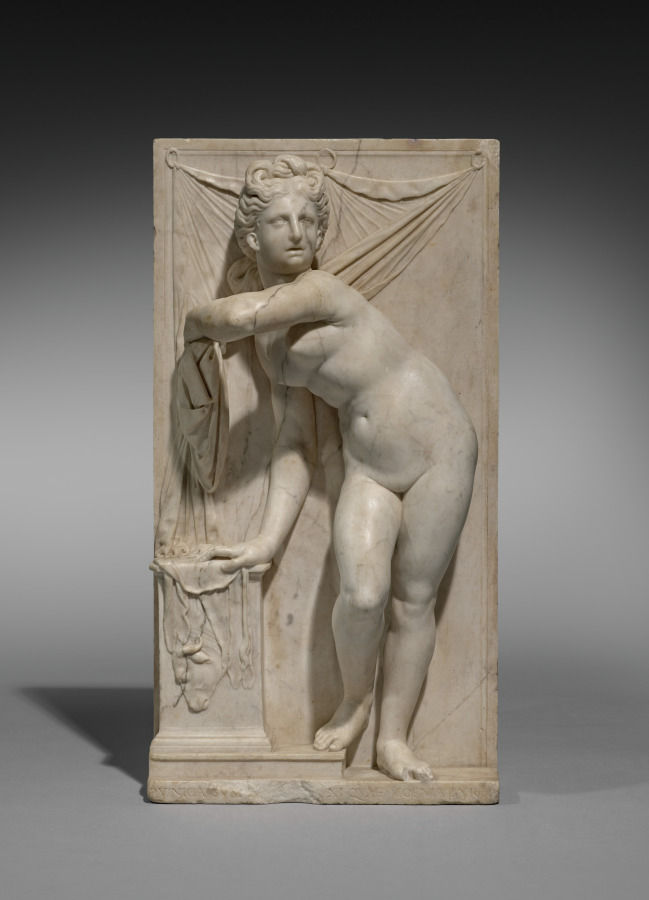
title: Dido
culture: Italy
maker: Aurelio Lombardo (Italian, 1501–1563)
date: c. 1525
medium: marble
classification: Sculpture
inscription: PVNICA SVM [DIDO ERE]XI QVAE MOENIA BYRSA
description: Artists customarily portrayed Dido as a forlorn lover abandoned by the Trojan hero, Aeneas, but here she is a conquering queen. Dido draws aside an oxhide curtain, a reference to the mythical founding of Carthage (in modern-day Tunisia, North Africa), when she was given an oxhide to demarcate granted land. By cutting it into thin strips she was able to encircle the future city. Dido was likely created for display in a studiolo, a place of study featuring refined works of art appreciated by humanist scholars and aficionados during the Renaissance.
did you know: Dido’s nudity and hairstyle are allusions to ancient Greek images of Aphrodite.